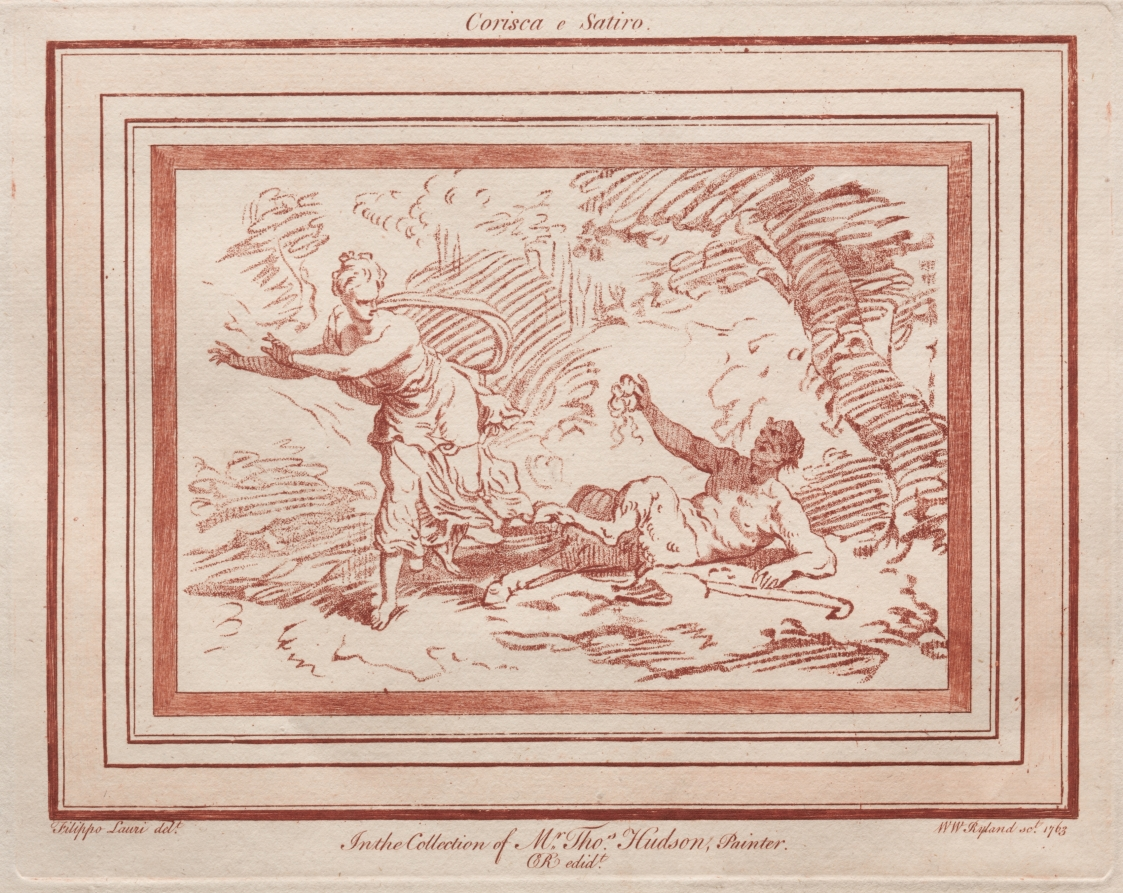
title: Corsica e Satiro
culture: England, 18th century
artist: William Ryland (British, 1732–1783)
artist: after Filippo Lauri (Italian, 1623–1694)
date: 1762–1763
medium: chalk-manner etching and engraving printed in red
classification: Print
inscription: inscribed, lower margin, in plate: In the Collection of George Earl Cholmondeley. / CR edidt.; inscribed, lower margin, in plate: In the Collection of Mr. Thos. Hudson, Painter. / CR edidt.